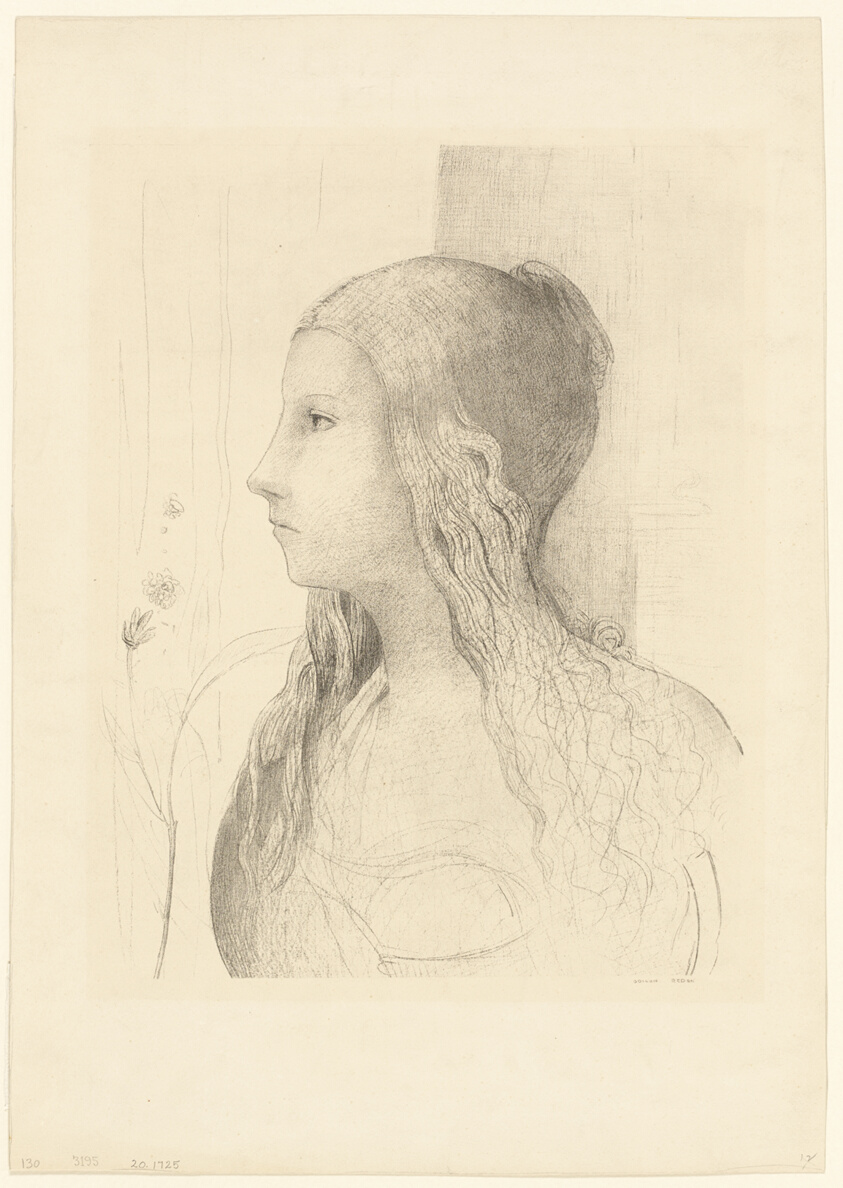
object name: Print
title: Brünnhilde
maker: Odilon Redon (French, 1840-1916)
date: 1894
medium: Lithograph in black on heavy cream wove paper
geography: France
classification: lithograph; print; prints and drawing; paper